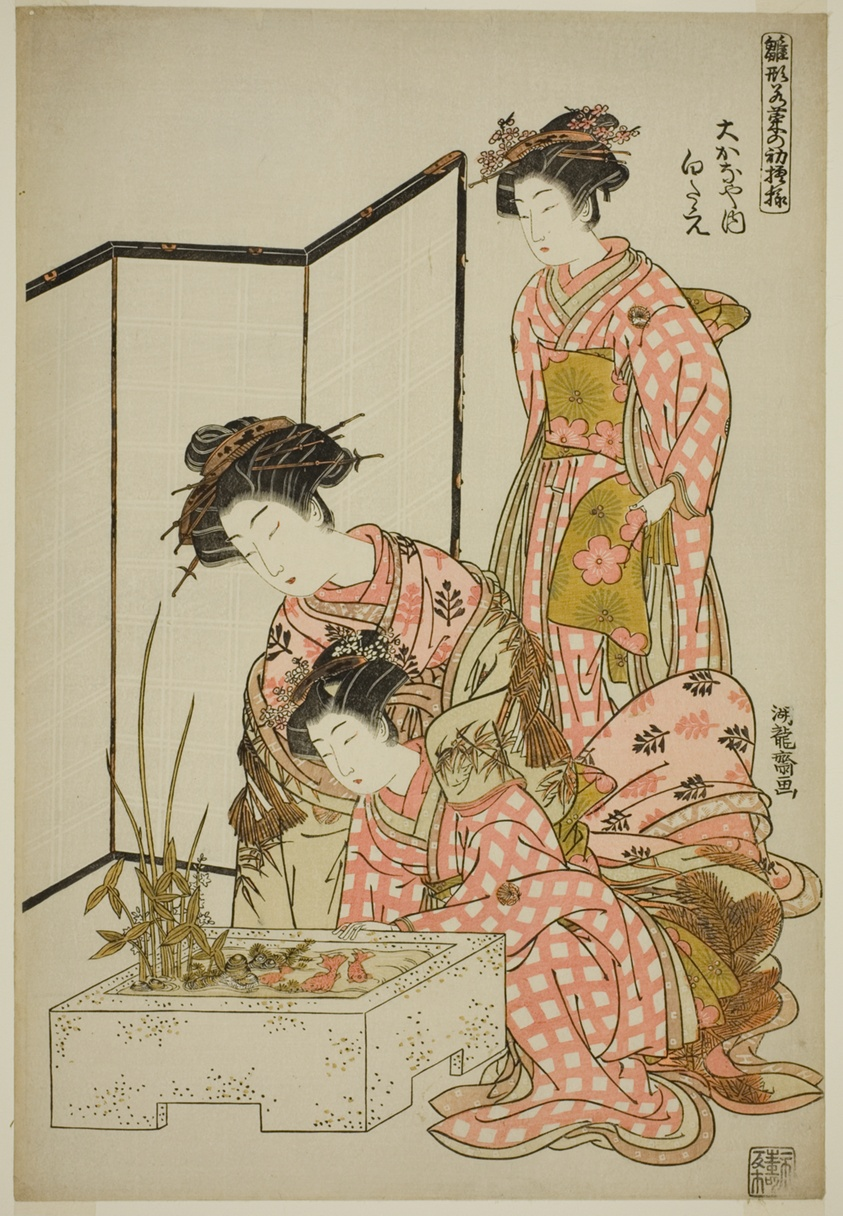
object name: Print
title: Shirotae of the Okanaya, from the series "Models for Fashion: New Designs as Fresh as Young Leaves (Hinagata wakana no hatsu moyo)"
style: Japanese (culture or style)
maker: Isoda Koryusai (Japanese, 1735-1790)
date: c. 1777/78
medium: Color woodblock print; oban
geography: Japan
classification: woodblock print; print; asian art